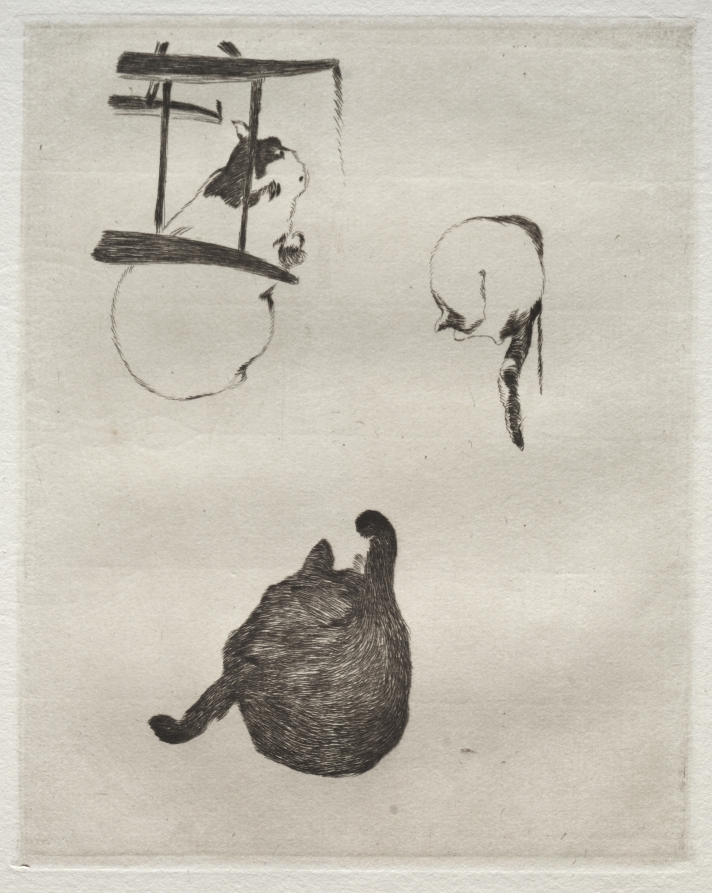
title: The Cats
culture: France, 19th century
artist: Édouard Manet (French, 1832–1883)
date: 1868–1869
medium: etching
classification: Print